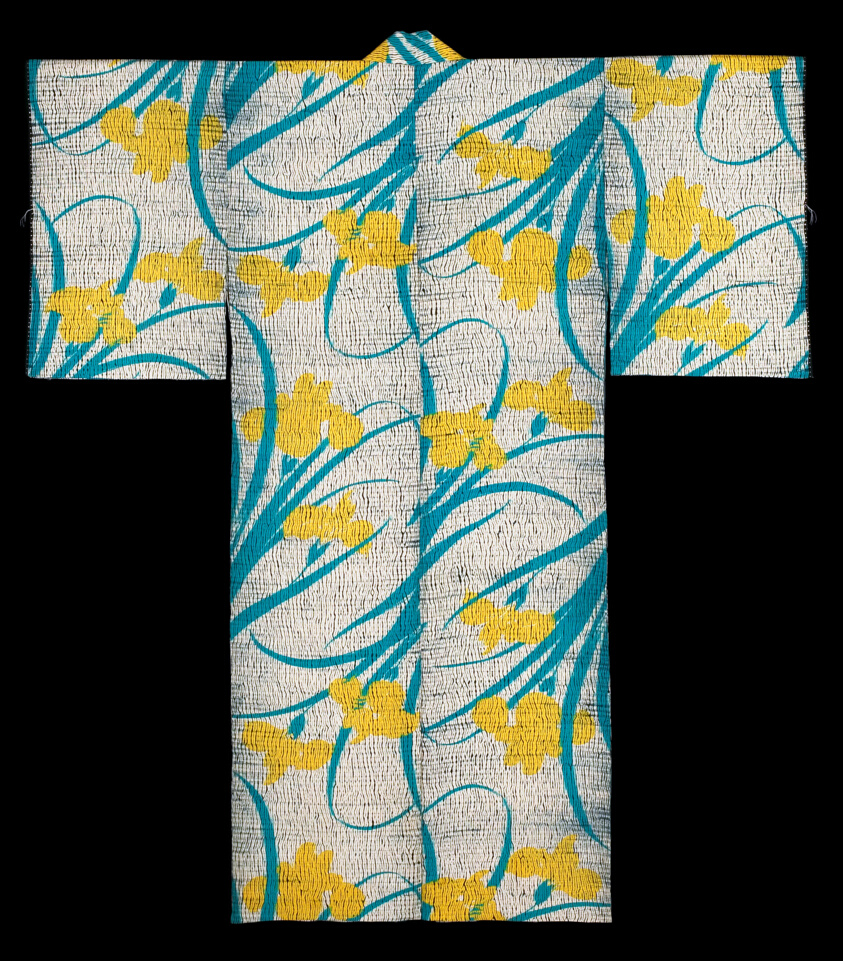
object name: Textile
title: Summer Kimono (Hitoe)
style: meiji, Japanism, East Asian, asian, taisho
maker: Japan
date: About 1900–1916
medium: Silk, plain weave self-patterned by rows of gauze crossings (yoko-ro); resist- dyed (shibori) and stenciled (kata yûzen-zome)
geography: Japan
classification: weaving - printed; textile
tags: fashion, flora